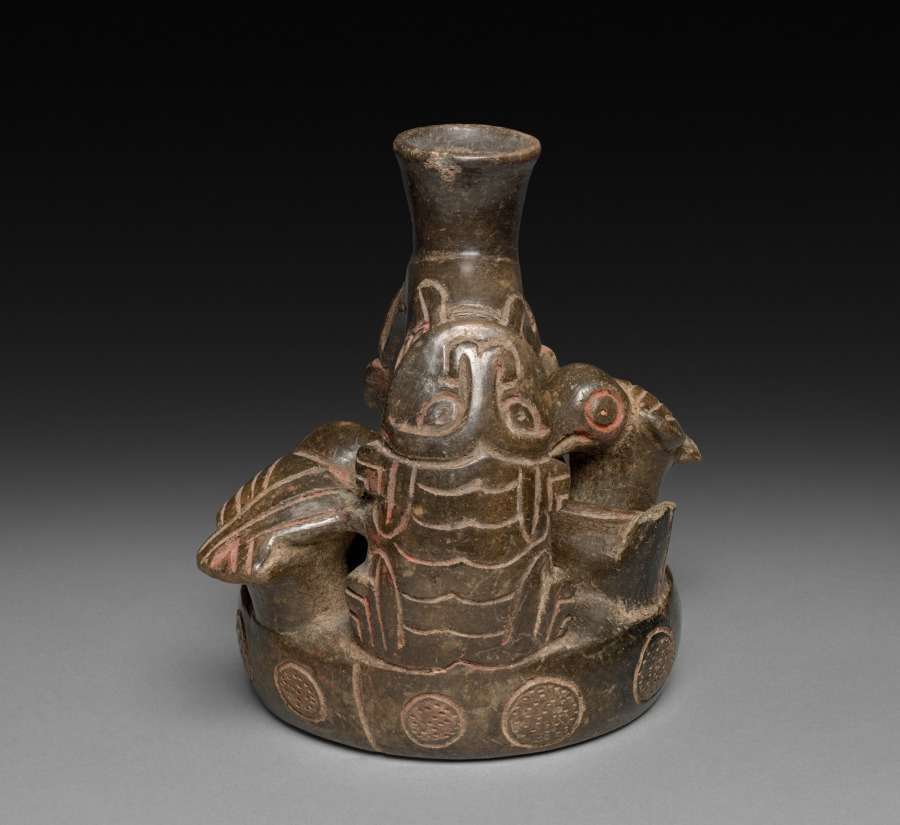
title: Vessel with Reclining Figure and Birds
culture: Andes, north coast, Cupisnique style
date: 2200–200 BCE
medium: Ceramic, pigment (cinnabar?)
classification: Ceramic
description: This ceramic vessel features a supine human being pecked by two birds that perch on the vessel’s doughnut-shaped chamber. The identity of the apparently mythical creature modeled in low relief on the sides of the stirrup-shaped spout is unknown. Little can be said about meaning beyond pointing out an obvious reference to death.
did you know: The stirrup-shaped form of the spout is common among Peruvian ceramics and unique to the ancient Americas.